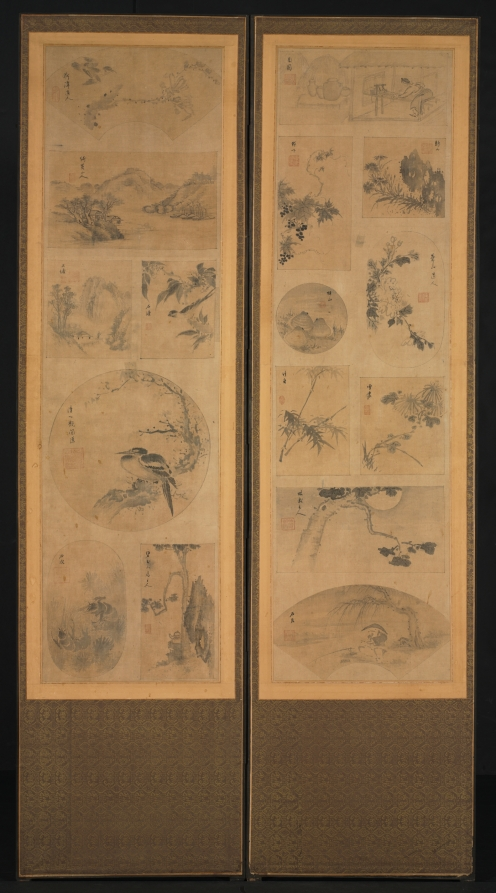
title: Painting of One Hundred Themes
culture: Korea, Joseon dynasty (1392–1910)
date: late 1800s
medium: Ten-panel folding screen affixed with album leaves (obverse), calligraphy (reverse), ink and color on silk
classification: Painting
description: The front of this screen features an assortment of subjects: birds and flowers, landscapes, and scenes of everyday life, mostly in monochromatic ink with light colors. The screen’s reverse side conveys a number of classical poems about the fleeting beauty of the four seasons. Traditionally, only one side of a folding screen bears painted or embroidered images, since these were used as a background furnishing. In Korean houses by the 1800s and early 1900s, however, two-sided folding screens became noticeably popular, possibly inspired by Japanese double-sided folding screens, which mainly served as room dividers in Japanese households.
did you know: The way of displaying small images of various subjects became one of the most popular type of painting toward the end of the 19th century.